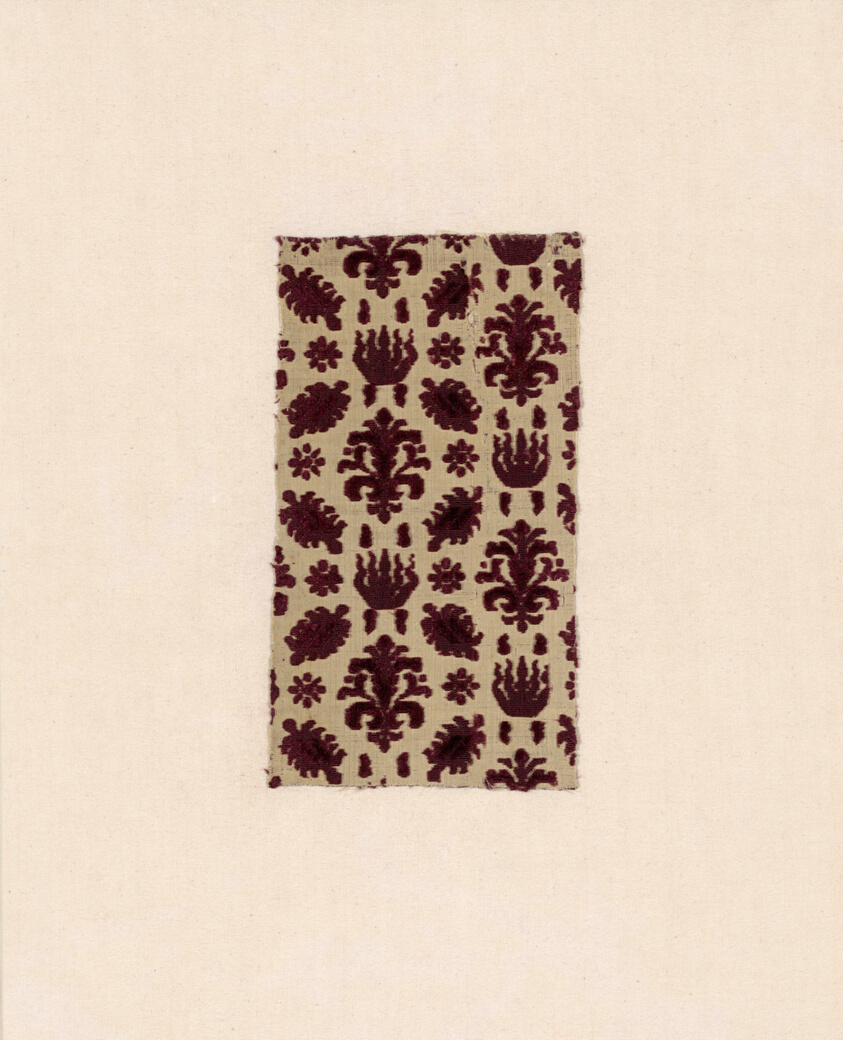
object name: Textile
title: Fragment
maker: Italy or Spain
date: 1625/50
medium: Silk, plain weave with supplementary pile warps forming cut, uncut, and voided velvet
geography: Italy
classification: textile; weaving - velvet